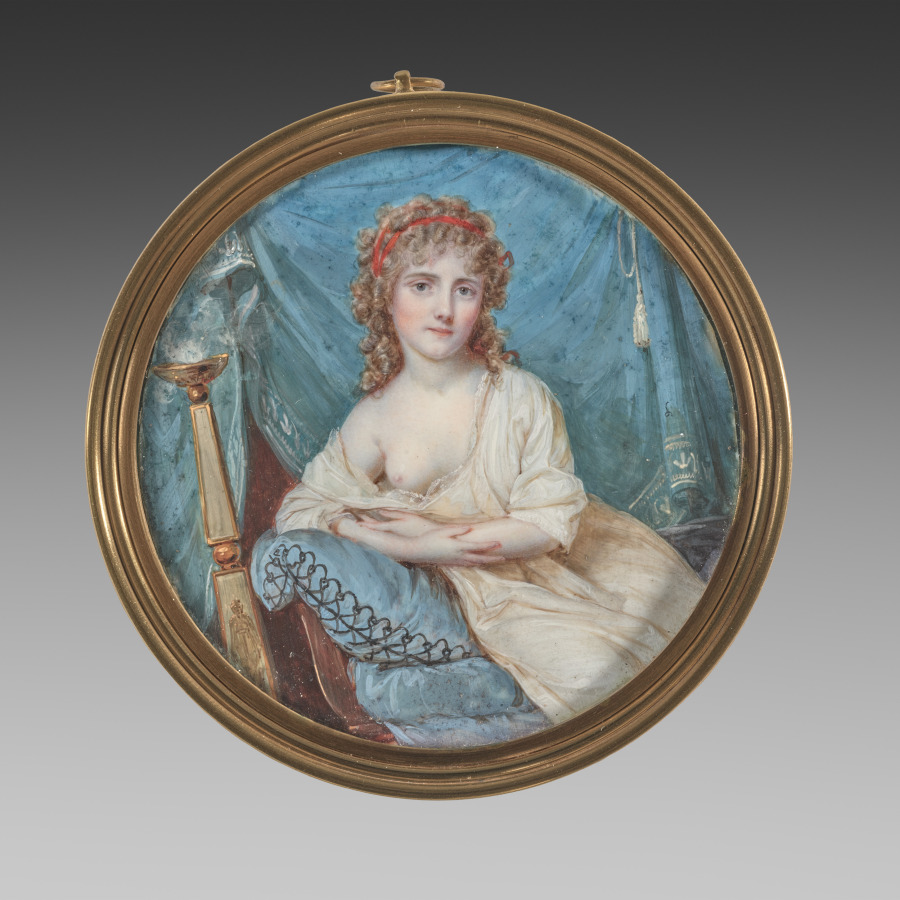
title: Portrait of a Woman Reclining on a Sofa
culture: France, 18th century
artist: Jean-Antoine Laurent (French, 1763–1832)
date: c. 1804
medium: watercolor on ivory in a gilt metal frame circa 1805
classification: Portrait Miniature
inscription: signed right: L